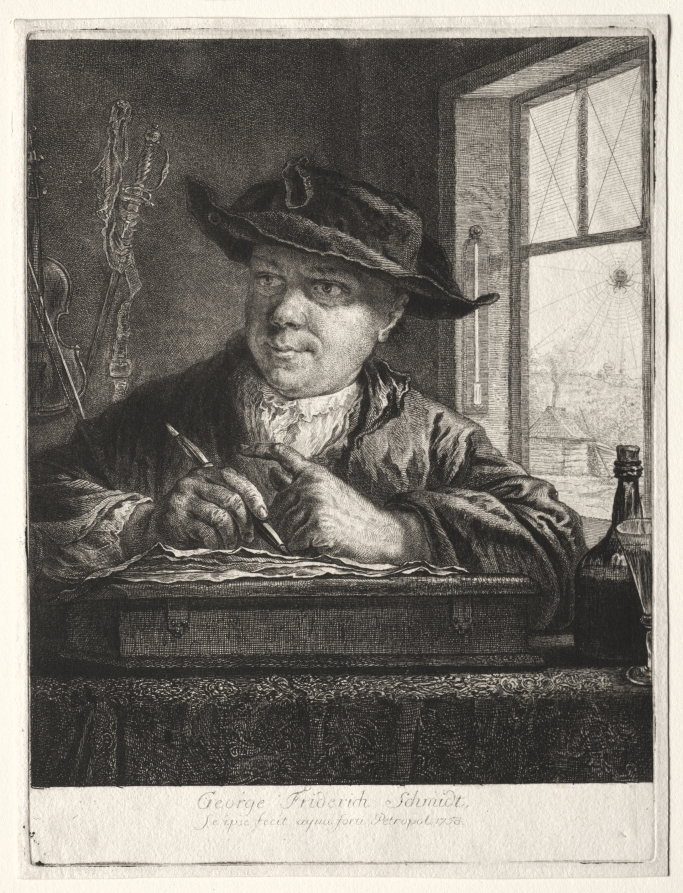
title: Self-Portrait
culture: Germany, 18th century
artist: Georg Friedrich Schmidt (German, 1712–1775)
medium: etching and drypoint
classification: Print